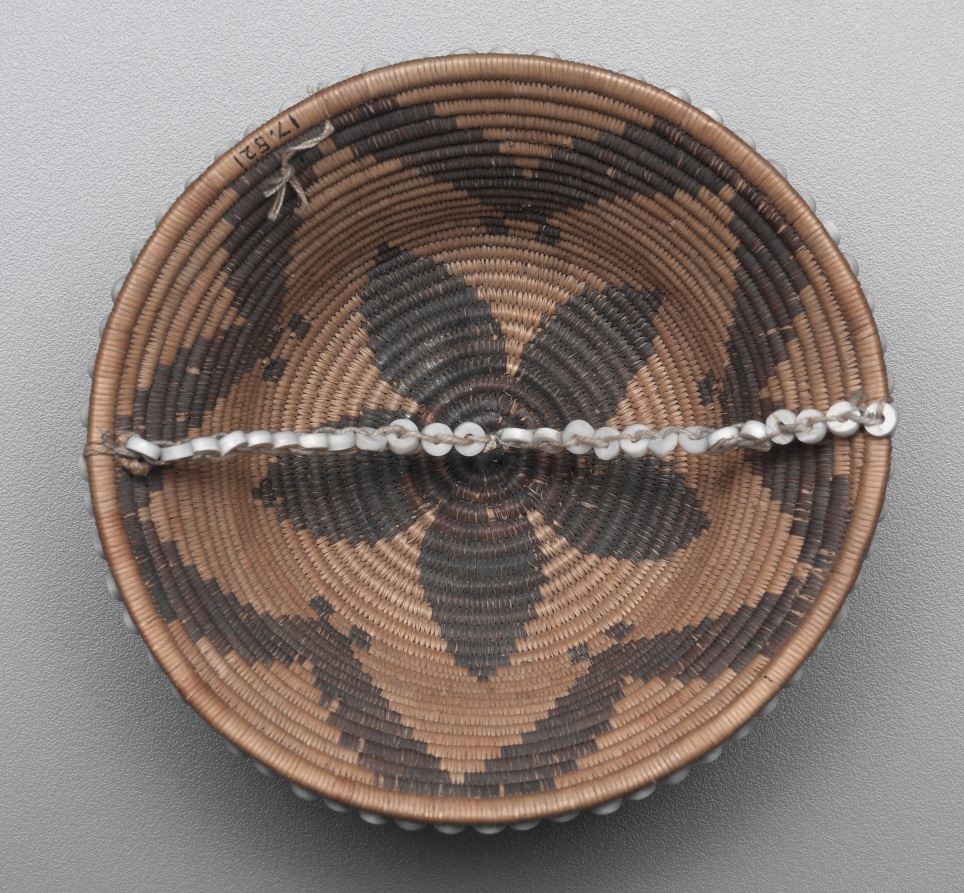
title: Gift Basket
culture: California, Pomo, Lytton Springs, Alexander Valley, late 19th-early 20th century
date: 1895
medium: Bulrush, Sedge; Coiled (3 rods)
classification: Basketry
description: These baskets were probably created to be sold to non-Indian collectors and tourists. The feathered basket, however, is based on an older type that was given as a treasured gift on various occasions, including ceremonies that marked the stages of life (birth, puberty, marriage, and so forth).